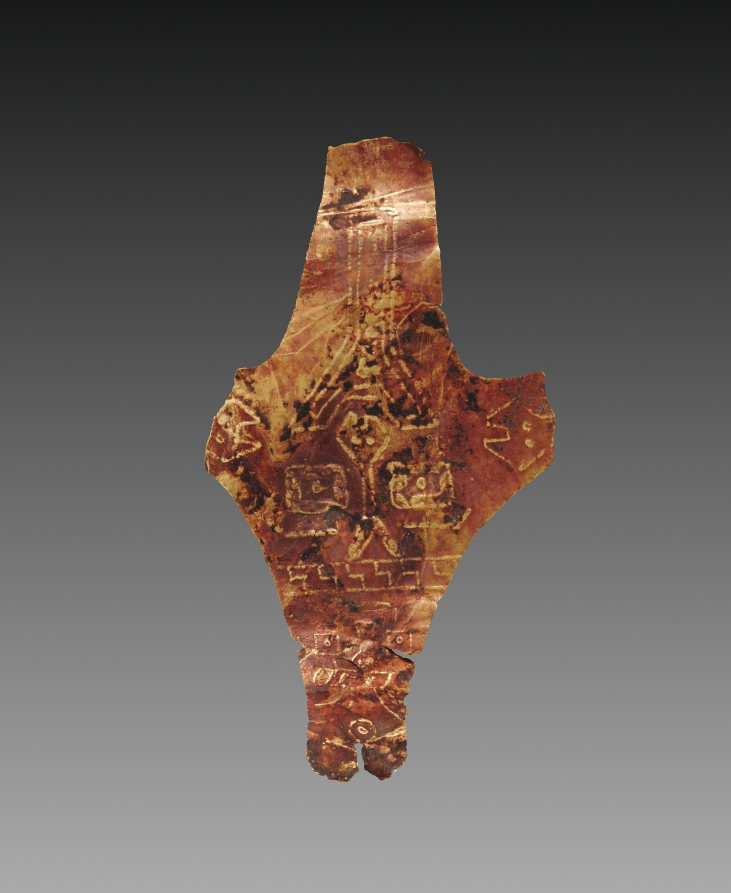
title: Ornament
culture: Peru, South Coast, Ica Valley?, Paracas, c. 300 BC-AD 100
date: c. 300 BCE–100 CE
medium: hammered and embossed gold-copper alloy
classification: Jewelry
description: With its grinning mouth and long, protruding tongue, the face embossed on this fragmentary ornament resembles linear images painted on mummy masks and woven on doublecloth tunics and mantles. Both painted mummy masks and doublecloth garments are most often found in the Ica Valley, a short distance south of the Paracas Peninsula. The ornament's original function is uncertain.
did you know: Tumbaga is an alloy made by blending gold with copper, which may give the gold a rosy hue.